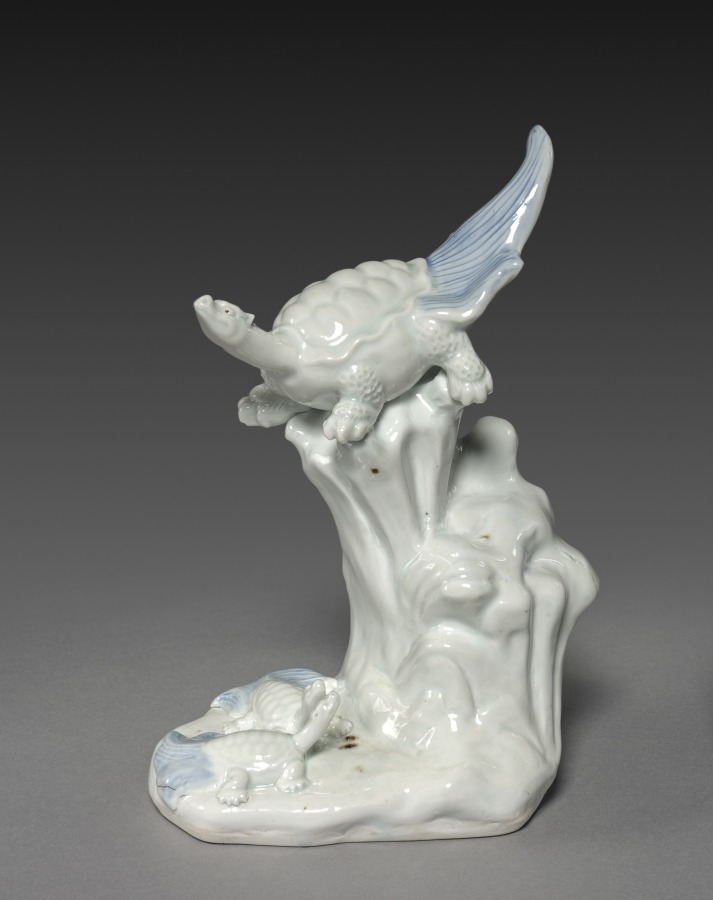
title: Tortoises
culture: Japan, Edo period (1615–1868)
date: early to mid-1800s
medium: porcelain, molded and carved, with underglaze blue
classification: Ceramic